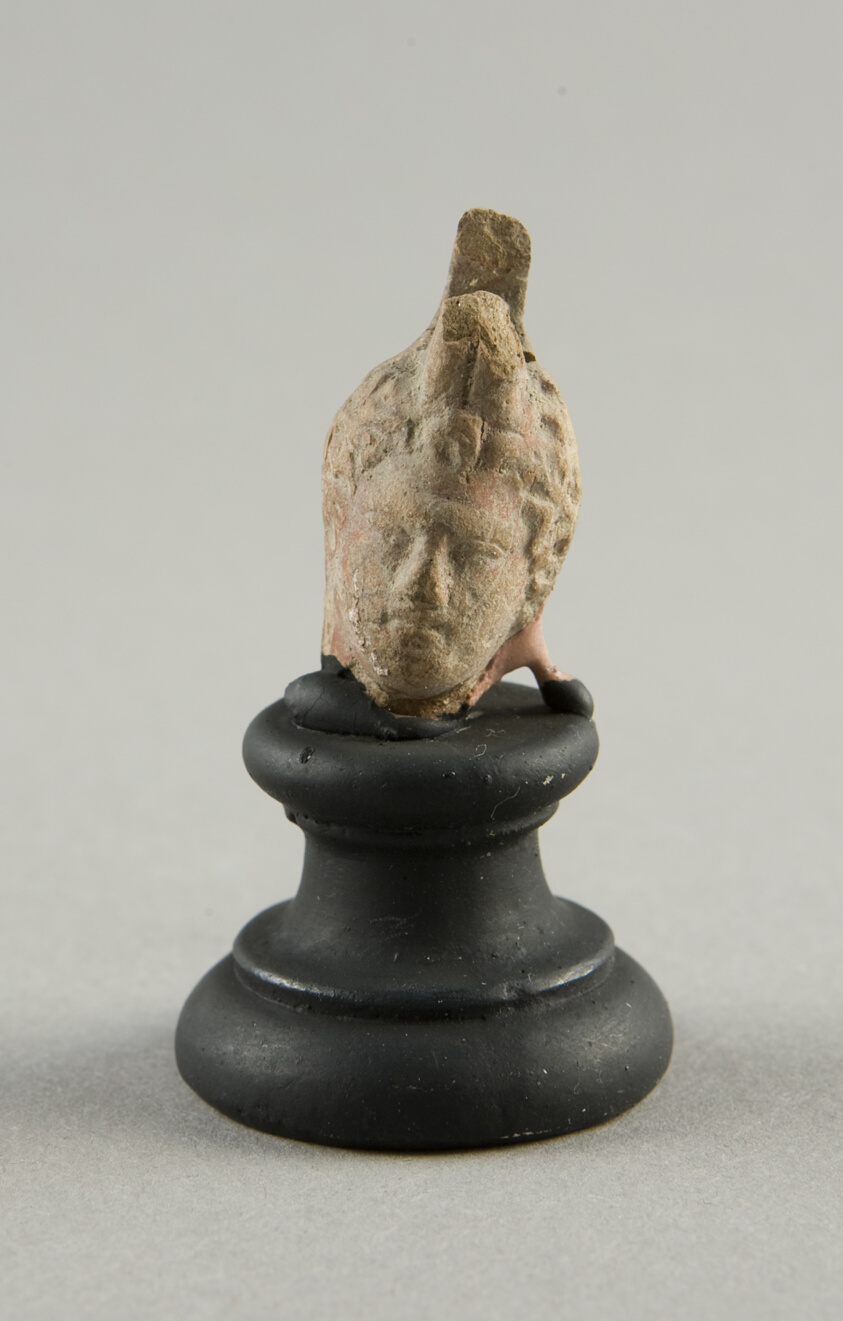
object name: Sculpture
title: Head of a Man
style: greek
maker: Greek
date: 3rd-1st century BCE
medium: terracotta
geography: Greece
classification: earthenware; ceramics; sculpture; ancient art